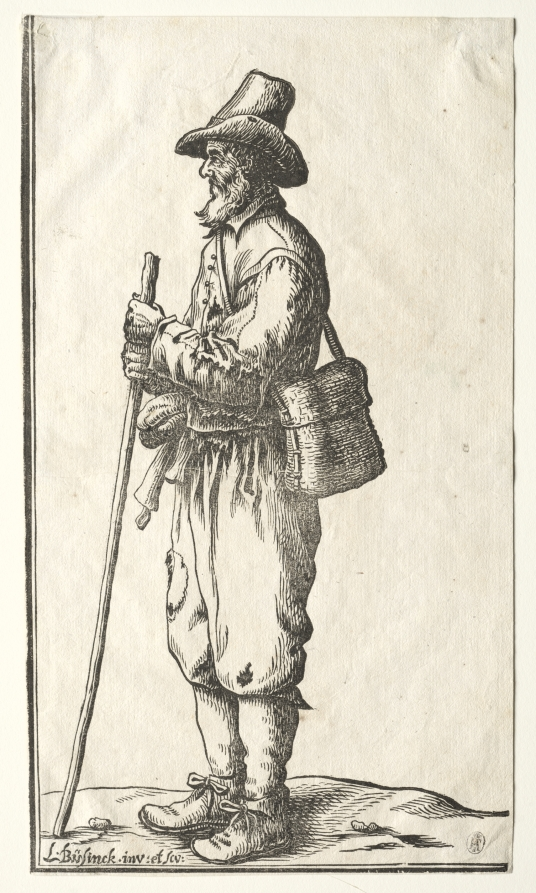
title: Beggar in Profile Toward Left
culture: Germany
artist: Ludolph Büsinck (German, 1590–1669)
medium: woodcut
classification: Print